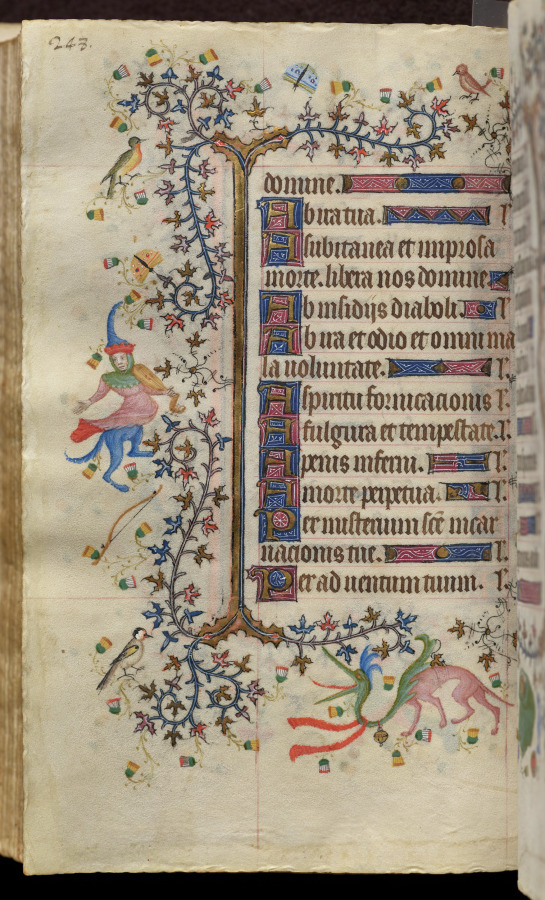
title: Hours of Charles the Noble, King of Navarre (1361-1425): fol. 124v, Text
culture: France, Paris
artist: Master of the Brussels Initials and Associates (French)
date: c. 1405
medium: ink, tempera, and gold on vellum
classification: Bound Volume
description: This precious volume was obviously highly prized by its owner, the French-born King of Navarre, who had his coat of arms painted on no less than twenty folios. Rather than directly commissioning this manuscript from a specific workshop, it seems that Charles the Noble acquired his book of hours -- perhaps ready-made for the luxury market -- while on a trip to Paris in 1404-05. A collaborative effort, six painting styles are evidenced within the pages of this codex, those of two Italians, two Frenchmen, and two Netherlanders. The painter who was responsible for the planning and decoration of the book, and who produced seventeen of the large miniatures, was a Bolognese artist known as the Master of the Brussels Initials. His principal assistant, responsible for most of the borders, was a Florentine who signed his name "Zecho" da Firenze on folio 208 verso.